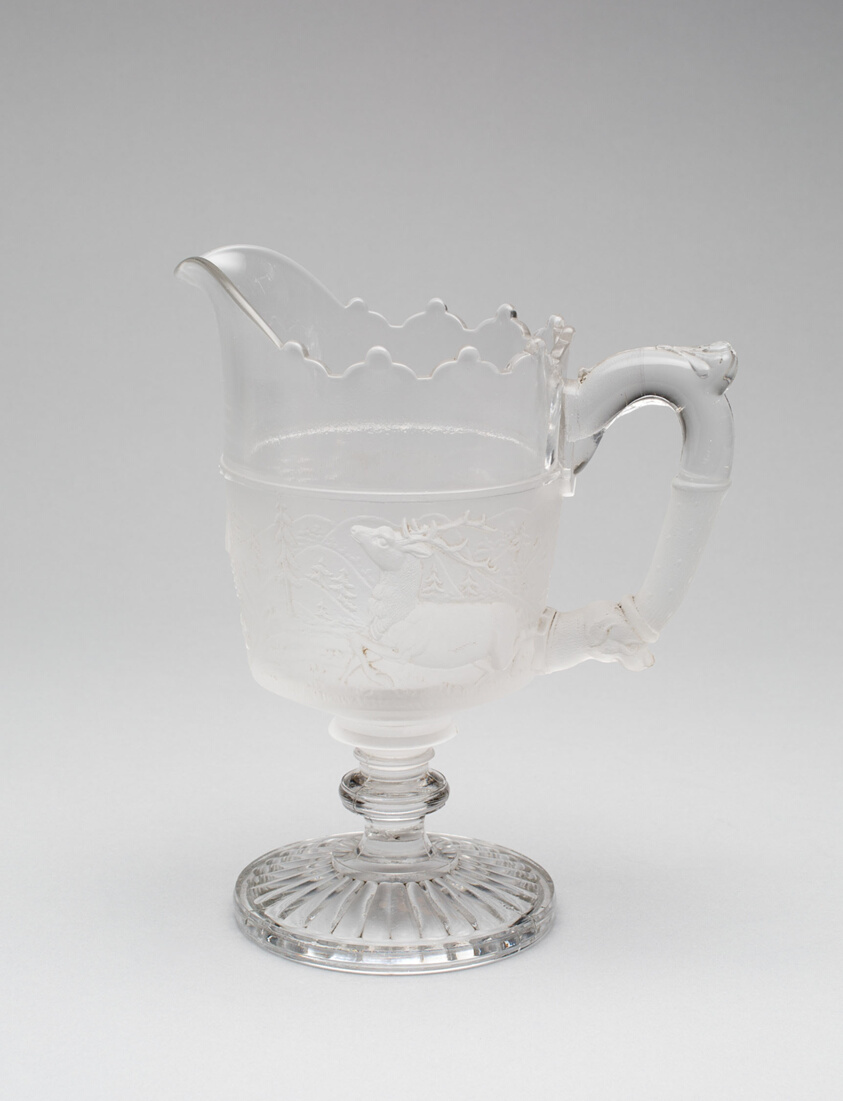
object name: Glass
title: "Westward Ho!/Pioneer" pattern cream pitcher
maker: Gillinder and Sons, 1861–c. 1930; Philadelphia or Greenbsburg, Pennsylvania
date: c. 1876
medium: Glass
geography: Philadelphia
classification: creamer; glass; american decorative arts; american arts; decorative arts